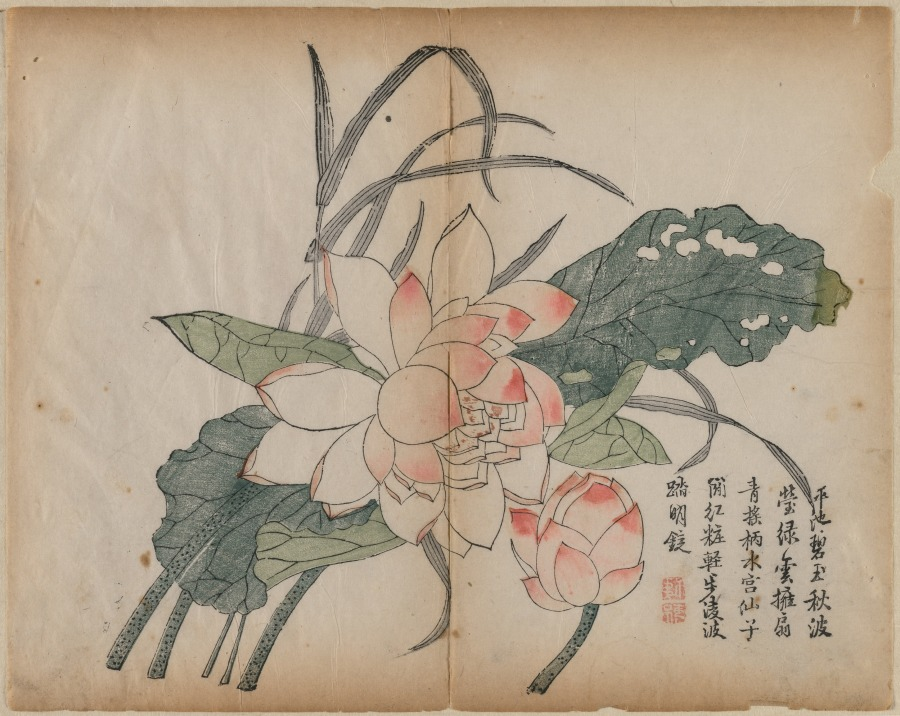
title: Flowering Lotus and Bud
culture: China, Qing dynasty (1644-1911)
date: 18th Century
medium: color woodblock print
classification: Print